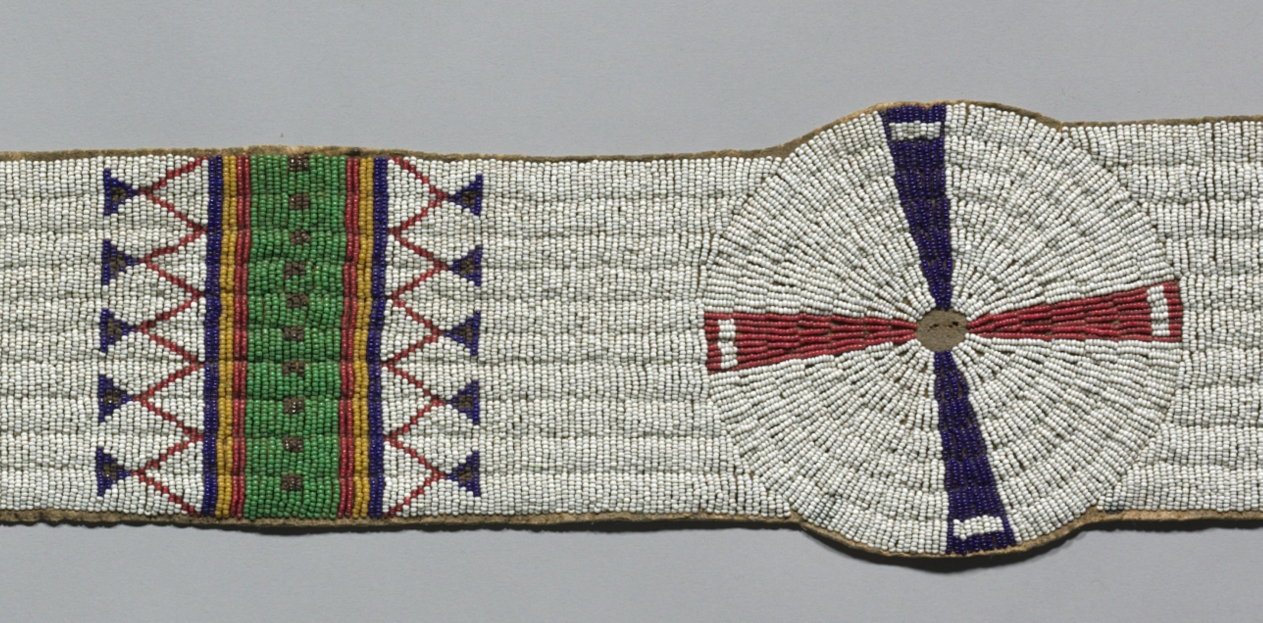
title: Blanket Strip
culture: Native North America, Plains, Tsitsistas (Cheyenne)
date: c. 1900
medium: Native-tanned hide, glass beads, metal beads, sinew thread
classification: Leather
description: The animal-hide robes basic to Plains attire were often ornamented with quilled or beaded strips, which also were stitched to the blankets that replaced robes. This beaded example carries the cross-in-a-circle motif that symbolizes the world, the four directions, and the sacred center, concepts central to Plains worldviews. In the 1932 words of Black Elk, the Oglala Lakota (Sioux) holy man, “[T]he power of the world always works in circles. . . . The flowering tree was at the center of the hoop, and the circle of the four quarters nourished it. . . . Everything the power of the world does is done in a circle.”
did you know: This beaded strip was stitched to a hide or a blanket.